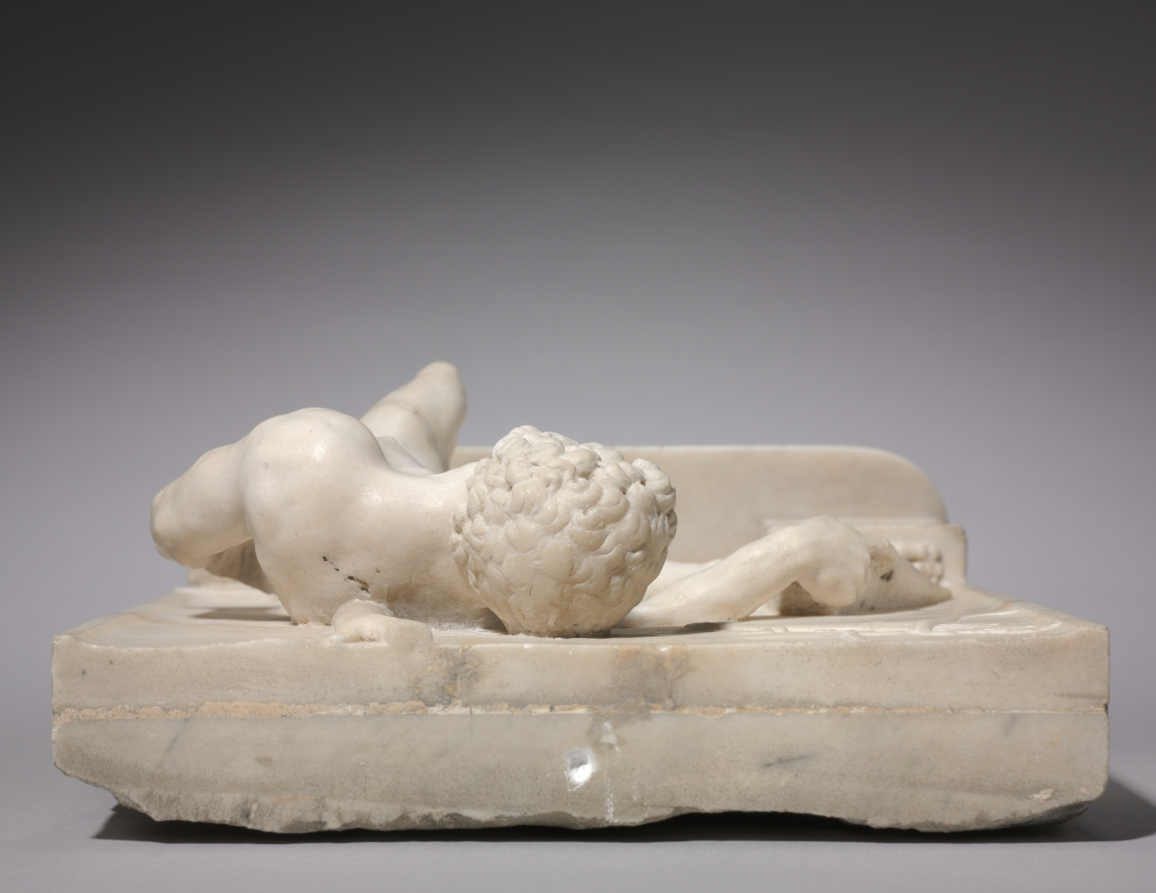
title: Philoctetes on the Island of Lemnos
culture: Italy, 16th century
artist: workshop of Giovanni Maria Mosca (Italian, 1495/99–1574)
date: c. 1510–1515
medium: marble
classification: Sculpture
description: A snake bit the Greek warrior Philoctetes en route to the Trojan War. The stench of the infected wound led the ship’s crew to abandon him on the island of Lemnos, where he fans the agonizing injury with a bird’s wing. The warrior’s noble suffering in the face of tremendous pain would have been a classical model of stoic composure, highly valued in Renaissance court culture.